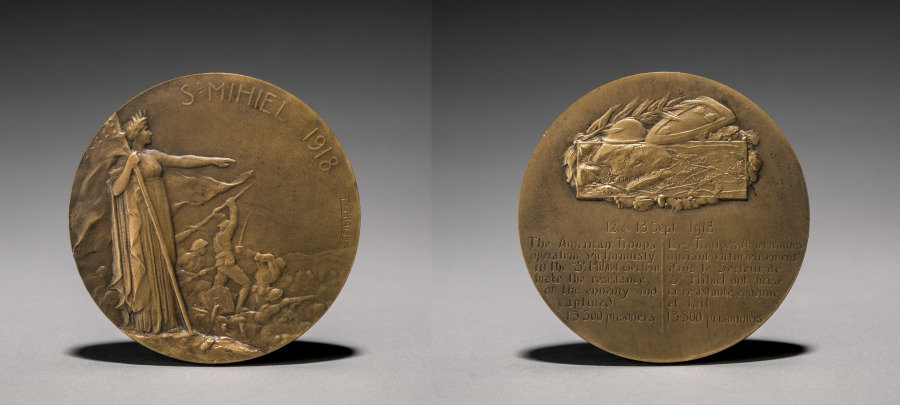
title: Medal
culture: France, 20th century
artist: Edouard Fraisse (French, 1880–1945)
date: 1900s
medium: bronze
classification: Metalwork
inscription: obverse - "St. Mihiel 1918." reverse - "12 - 13 Sept. 1918"; in French and English: "The American Troops operating victoriously in the St. Mihiel secteur broke the resistance of the enemy and captured 13,300 prisoners."